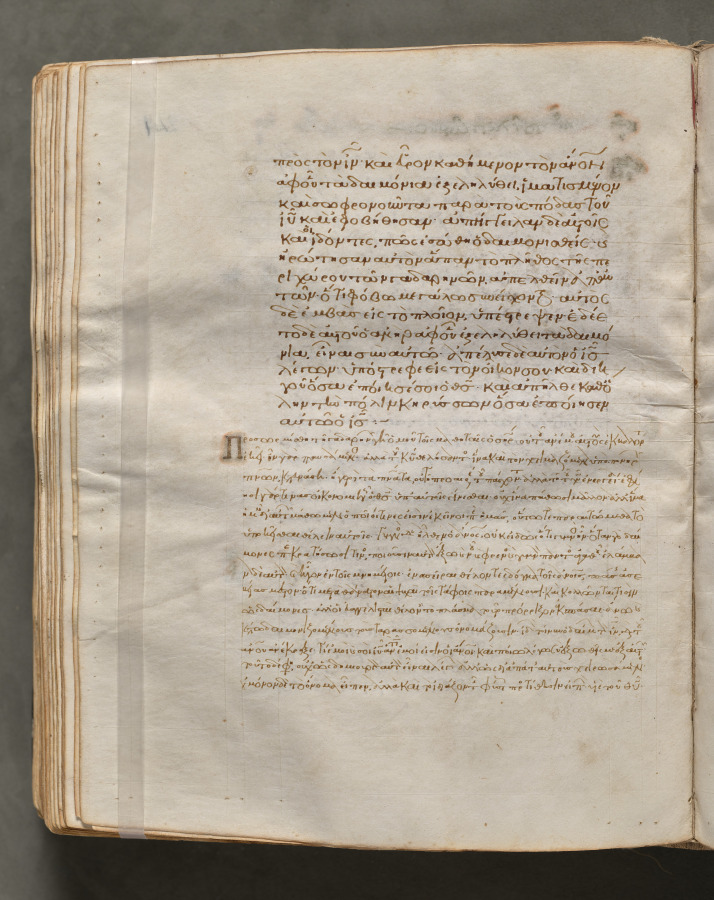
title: Text, folio 241 (verso), from a Gospel Book with Commentaries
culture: Byzantium, Constantinople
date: c. 1000–1100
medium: ink, tempera, and gold on vellum; leather binding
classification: Bound Volume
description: Each of the four gospels in this book opens on a page with brilliantly illuminated borders depicting the author of the text as well as birds—principally peacocks, symbols of the immortality of the soul—and fountains, representing the fountain of life and the salvation of the soul. This volume consists of 428 leaves with texts in Greek. Its level of sophistication suggests that it was probably written and decorated in a monastery in Constantinople.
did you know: Gospel books were carried in procession through Byzantine churches.